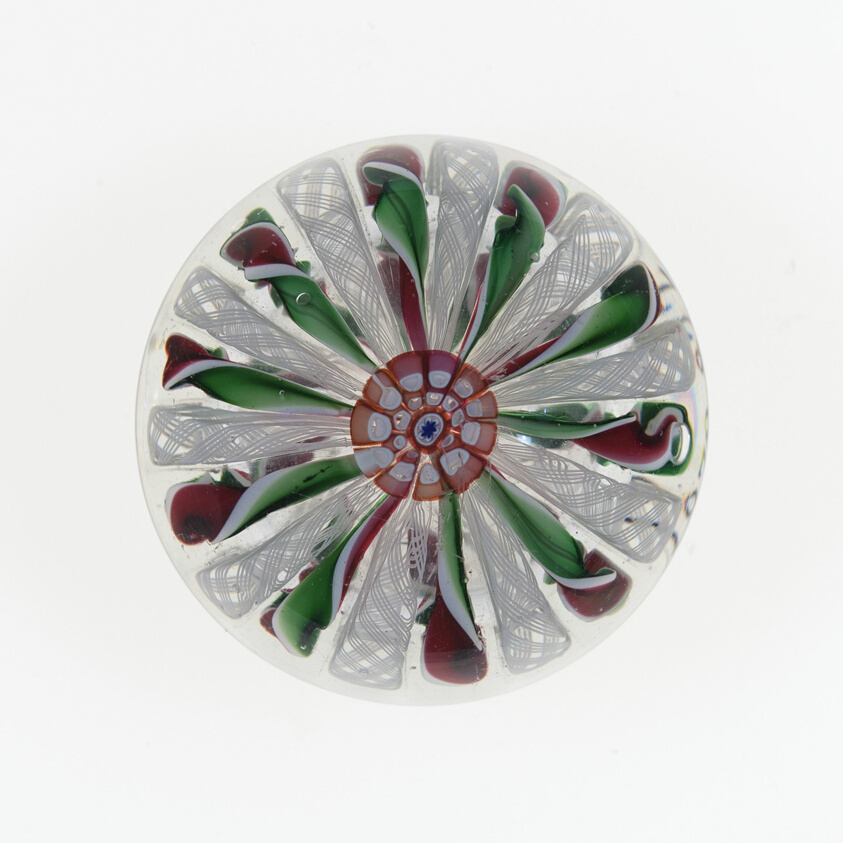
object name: Glass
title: Paperweight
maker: Saint-Louis Glassworks (Cristalleries de Saint-Louis); Lorraine, France, founded 1586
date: c. 1845–55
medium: Glass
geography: Saint-Louis-lès-Bitche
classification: paperweight; lampwork; european decorative arts; glass